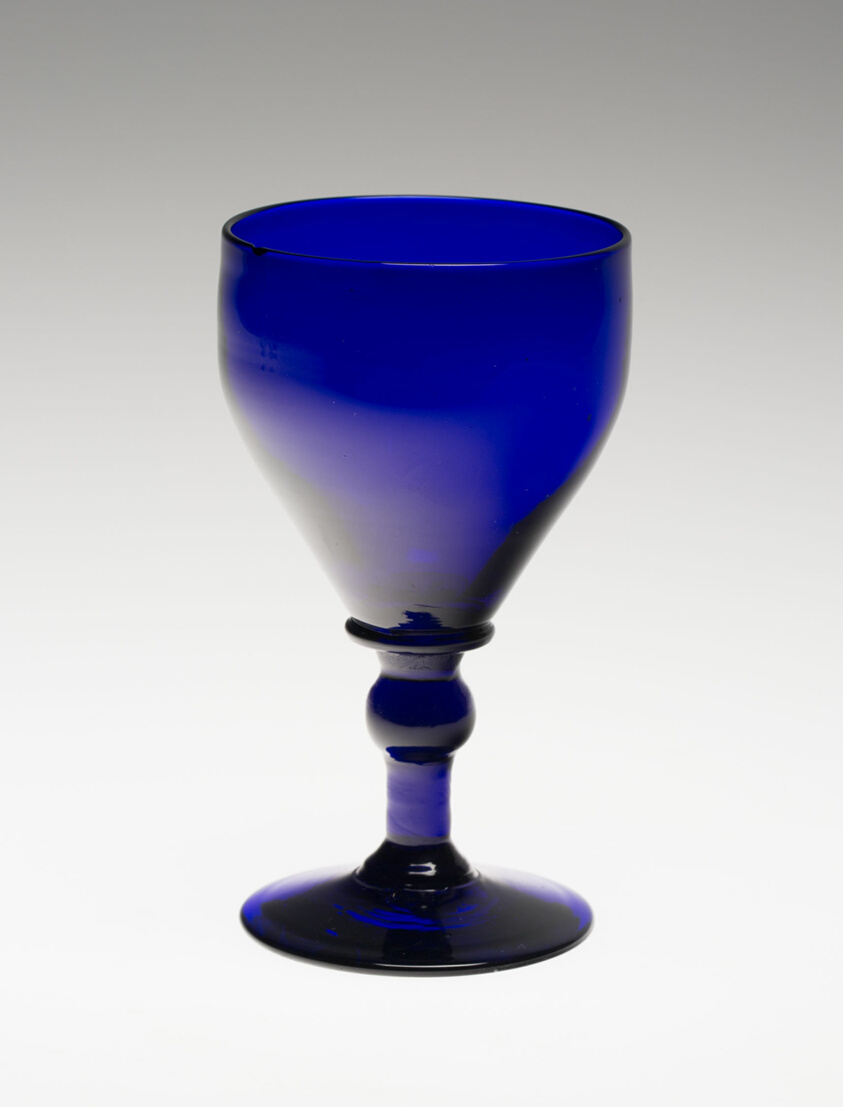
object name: Glass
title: Rummer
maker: England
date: 1750/1850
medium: Glass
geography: England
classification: glass